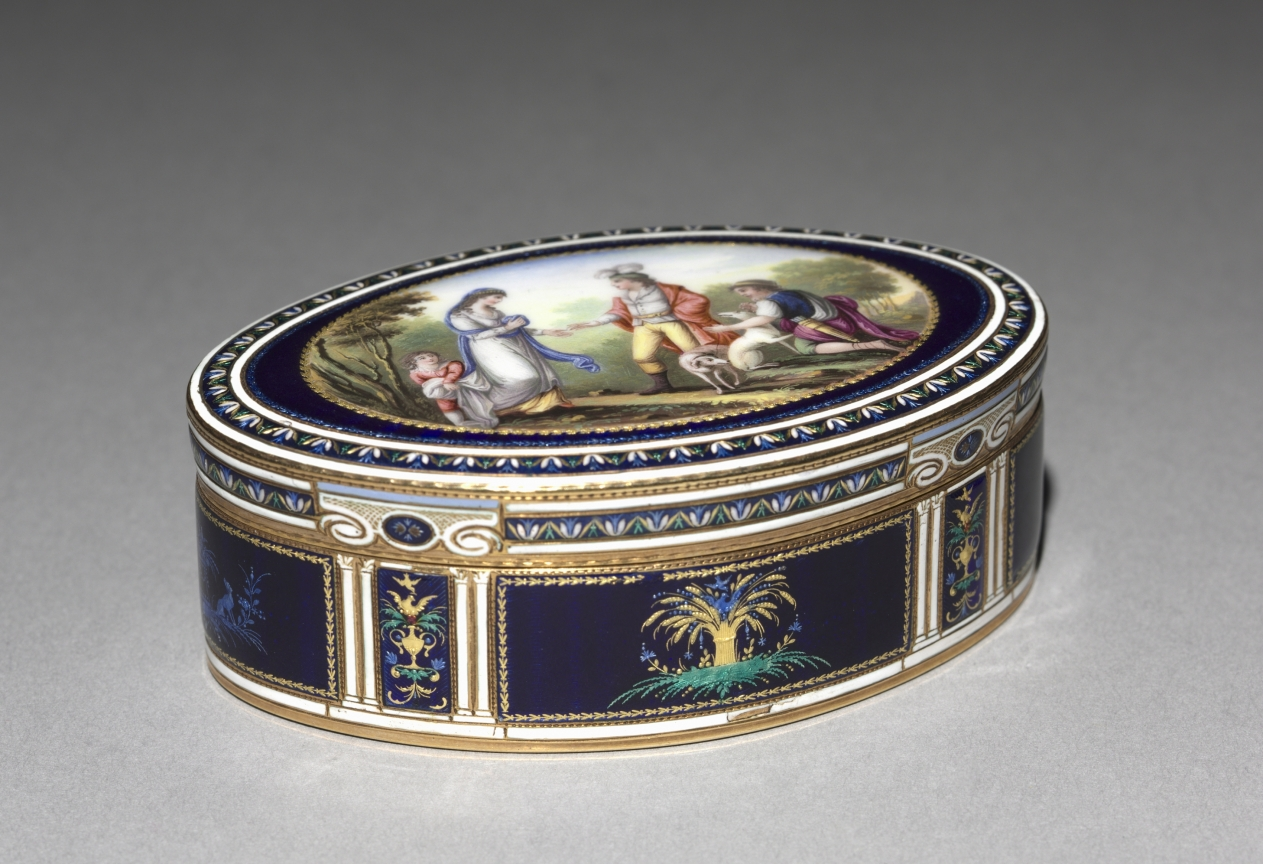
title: Box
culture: Switzerland, Geneva, late 18th Century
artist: Georges Rémond et Cie (Swiss)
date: late 1700s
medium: gold and enamel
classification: Enamel